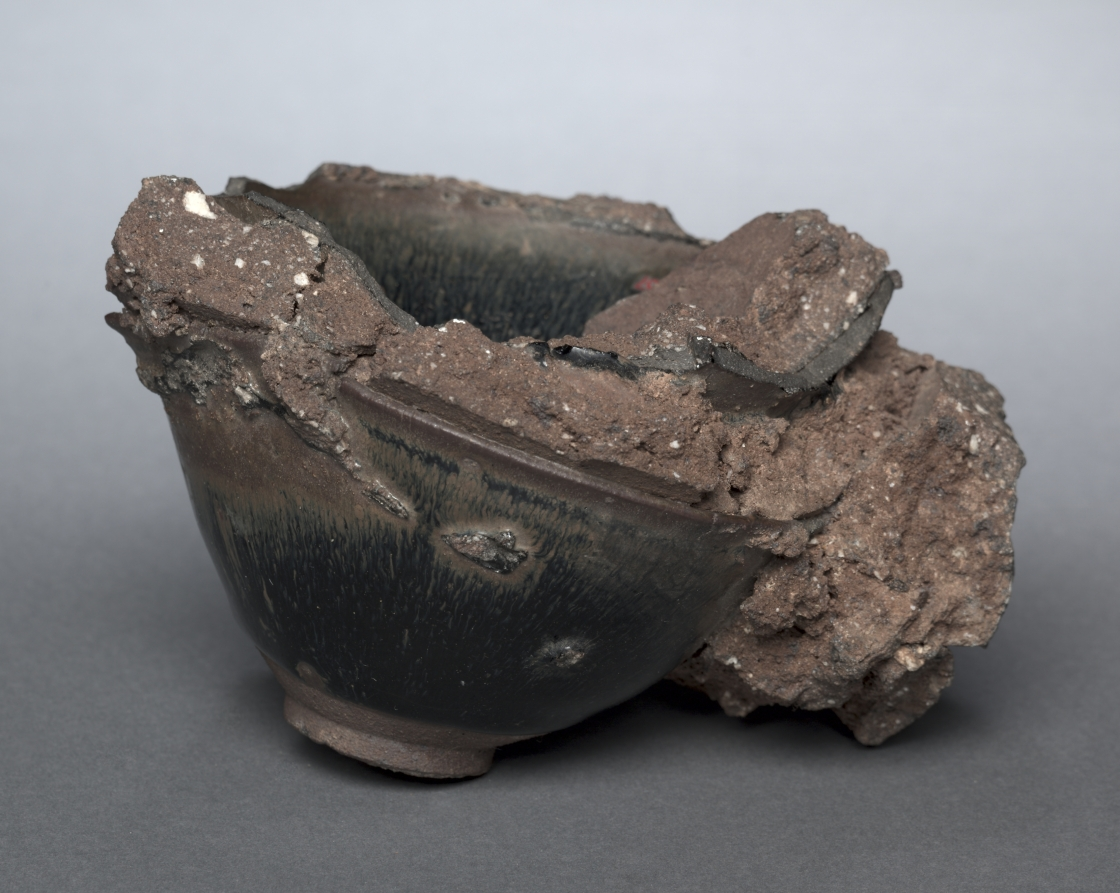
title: Saggers and Bowl Fragments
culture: China, near Shui ch'i, Song dynasty (960-1279)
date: 960–1279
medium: stoneware with "hare's fur" glaze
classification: Ceramic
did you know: A sagger is a ceramic box-like container used to protect pottery while being fired inside a kiln.